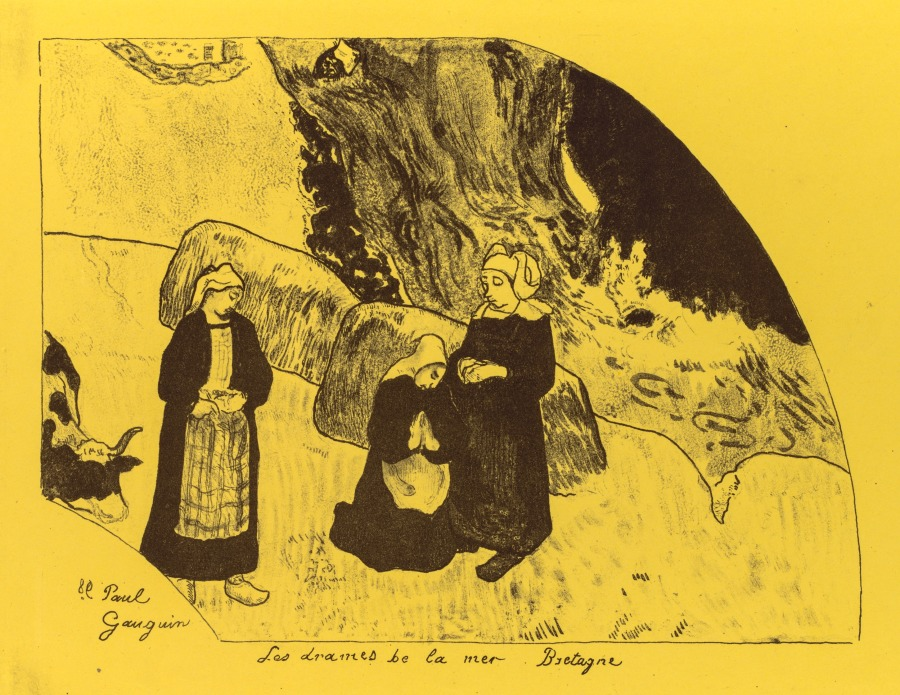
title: Volpini Suite: Dramas of the Sea: Brittany (Les Drames de la Mer, Bretagne)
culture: France, 19th century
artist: Paul Gauguin (French, 1848–1903)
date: 1889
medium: zincograph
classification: Print